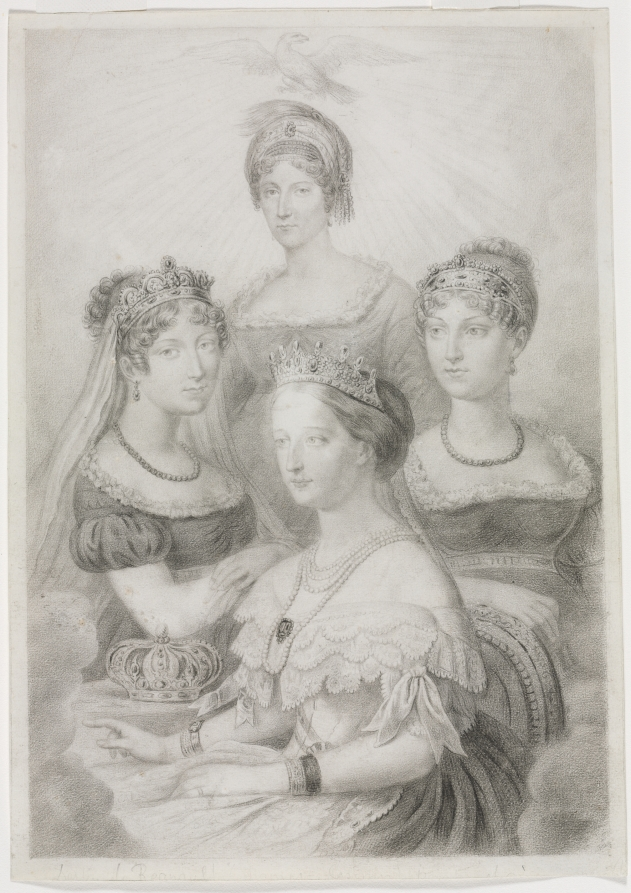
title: Bonaparte Women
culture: France, 19th century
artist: Thomas Casimir Regnault (French, 1823–1875)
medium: black chalk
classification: Drawing